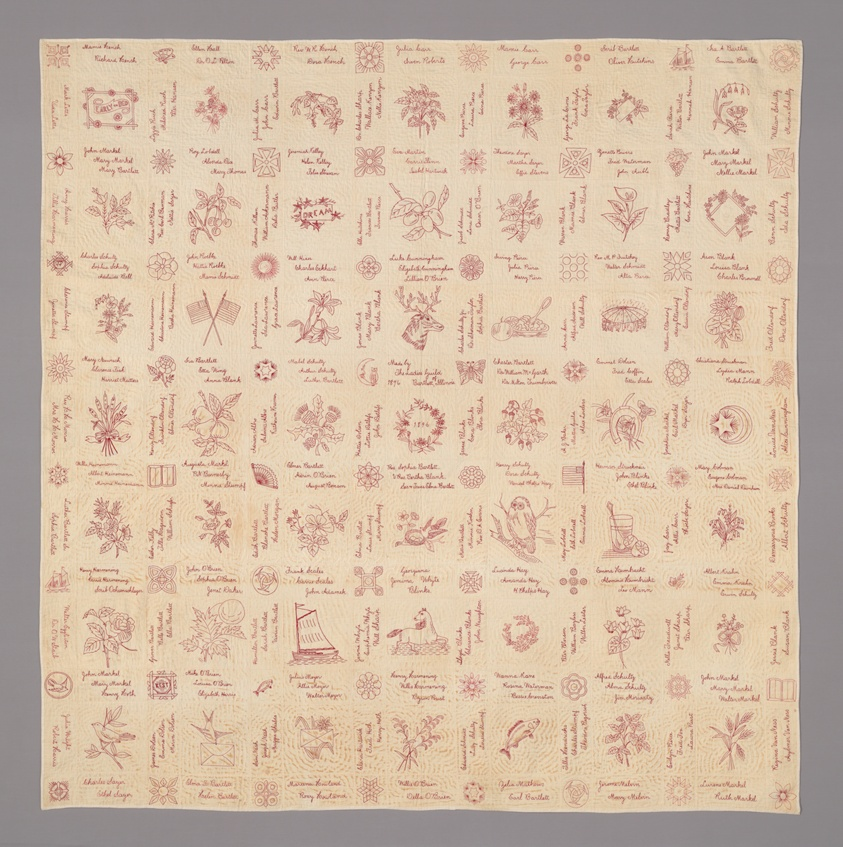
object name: Textile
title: Signature Quilt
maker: Bartlett, Illinois, United States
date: 1896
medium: Embroidered, cotton plain weave quilt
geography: Illinois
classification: textile; needlework - quilt